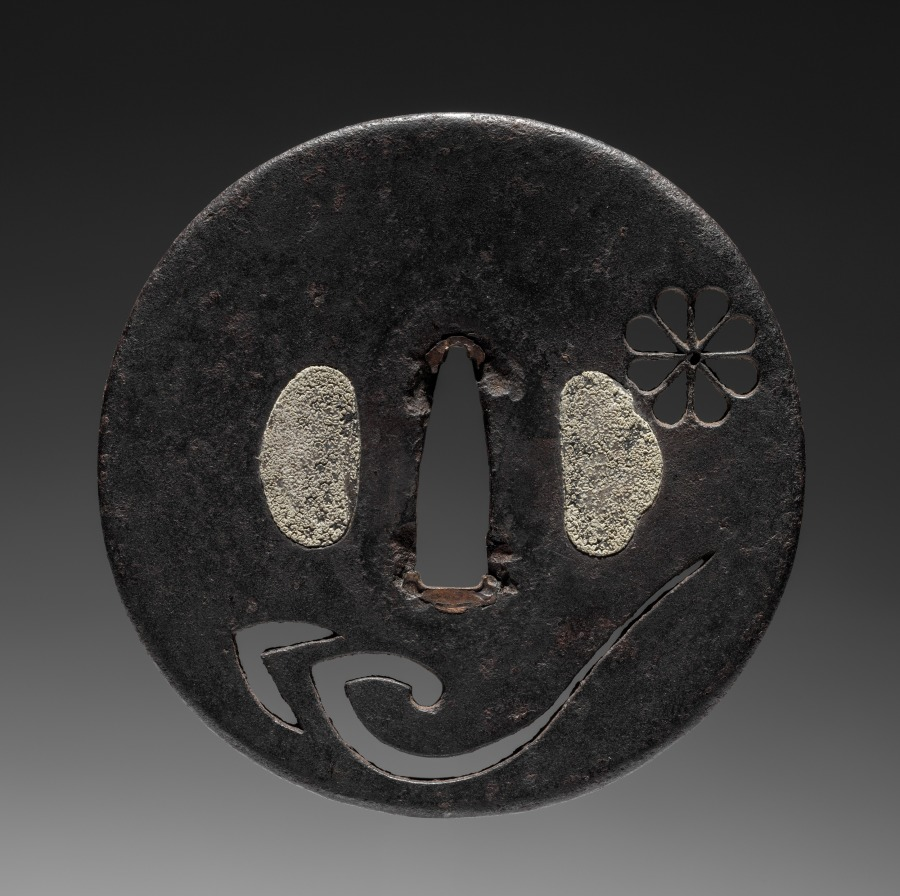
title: Sword Guard (Tsuba)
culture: Japan, possibly Edo period (1615-1868)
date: c. 1615–1868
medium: iron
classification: Arms and Armor